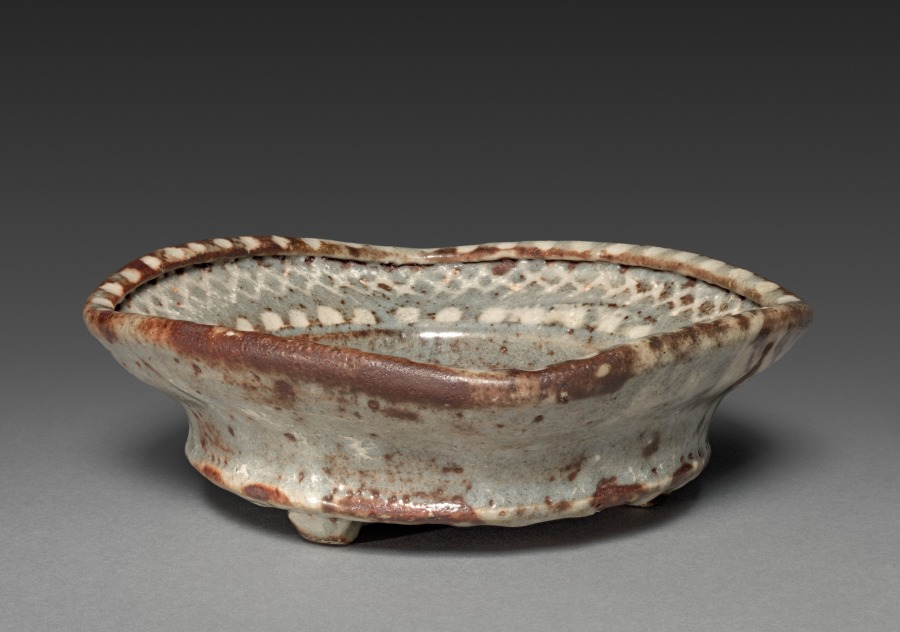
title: Dish with Design of Three Wild Geese in Flight: "Nezumi" Shino Ware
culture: Japan, Momoyama period (1573–1615)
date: c. 1600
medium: stoneware with underglaze iron slip decoration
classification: Ceramic